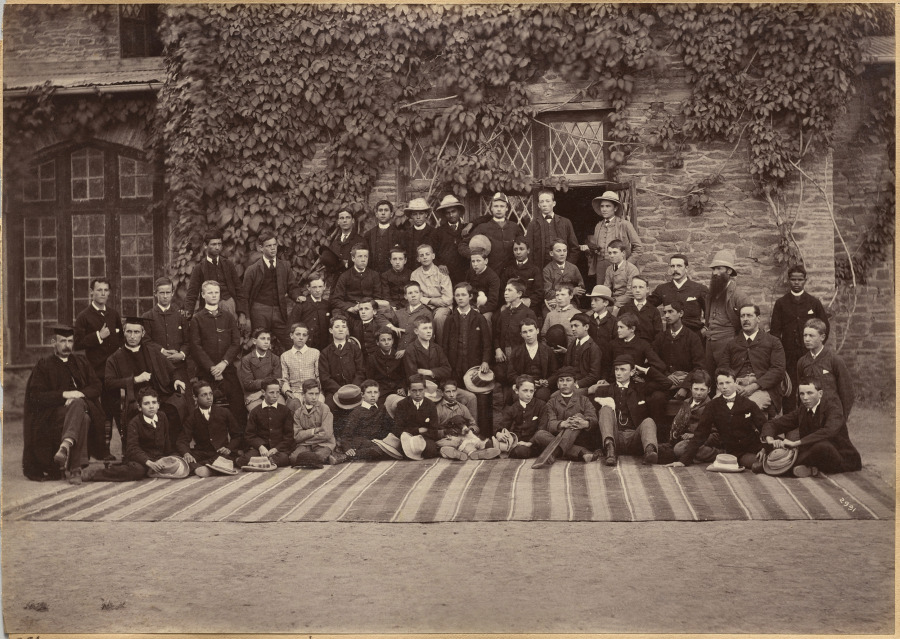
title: Middle Class Students and Staff, Bishop Cotton School, Shimla (verso)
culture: India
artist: Raja Deen Dayal (Indian, 1844–1905)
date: c. 1882–87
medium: albumen print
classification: Photograph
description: These photographs are part of an album, now disassembled, of around 105 photographs taken in India between 1885 and summer 1887 that provide glimpses into the lives of the British colonial elite and royal and upper-class Indians. The museum holds another group of 37 pictures from this album (2016.266), which was probably commissioned by a British civil servant visiting or working in India around 1888 as a personal souvenir of his experiences there.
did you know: Raja Deen Dayal is regarded now, and was considered during his lifetime, to be India’s most important 19th-century photographer.